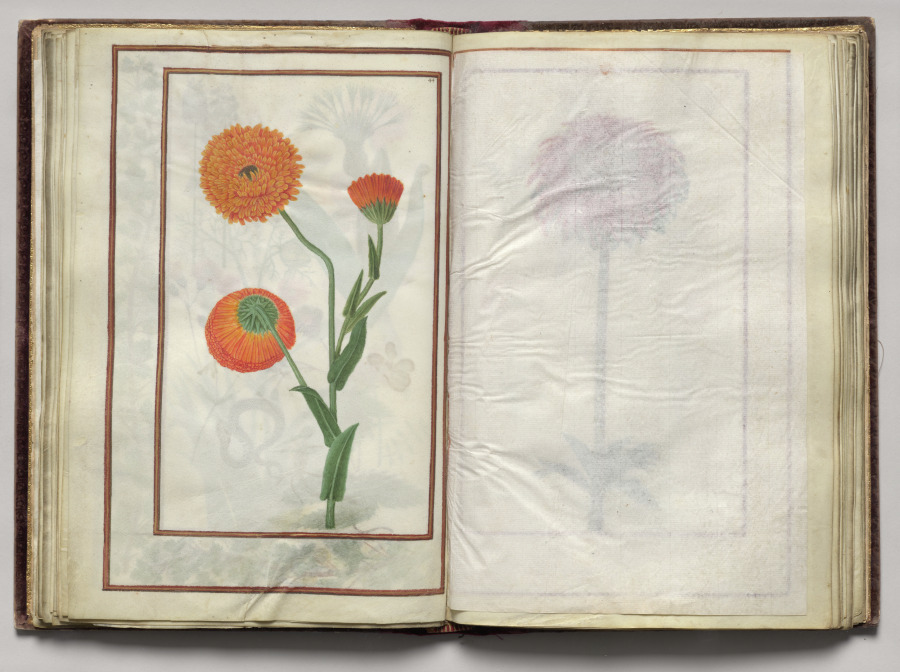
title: Orange Caligula, folio 22 (verso), from Florilegium (A Book of Flower Studies)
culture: France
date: 1608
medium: watercolor, ink, silver, and gold over occasional traces of pencil, on vellum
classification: Bound Volume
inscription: Dated: Poitiers 1608 (on frontispiece) Signed: On frontispiece in black ink, lower right: Van Kuyk Notation on drawing: Frontispiece: in pencil, lower margin: * élève de Van Kessel, peintre flammand (* in pencil also appears in front of Van Kuyk's name).